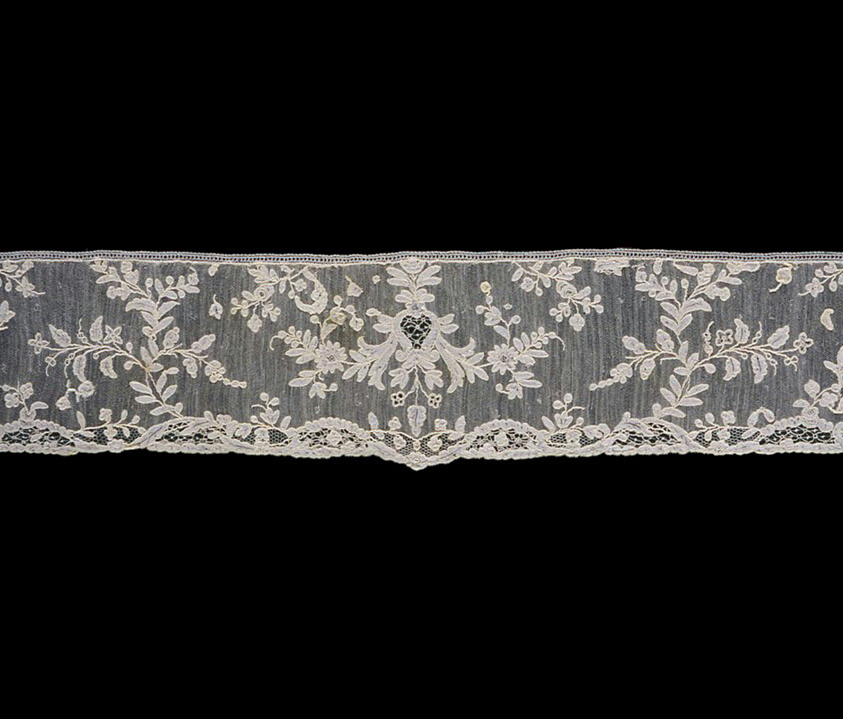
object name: Textile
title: Borders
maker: Italy, Burano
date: 1760s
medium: Linen, needle lace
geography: Burano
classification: textile; lace - needle